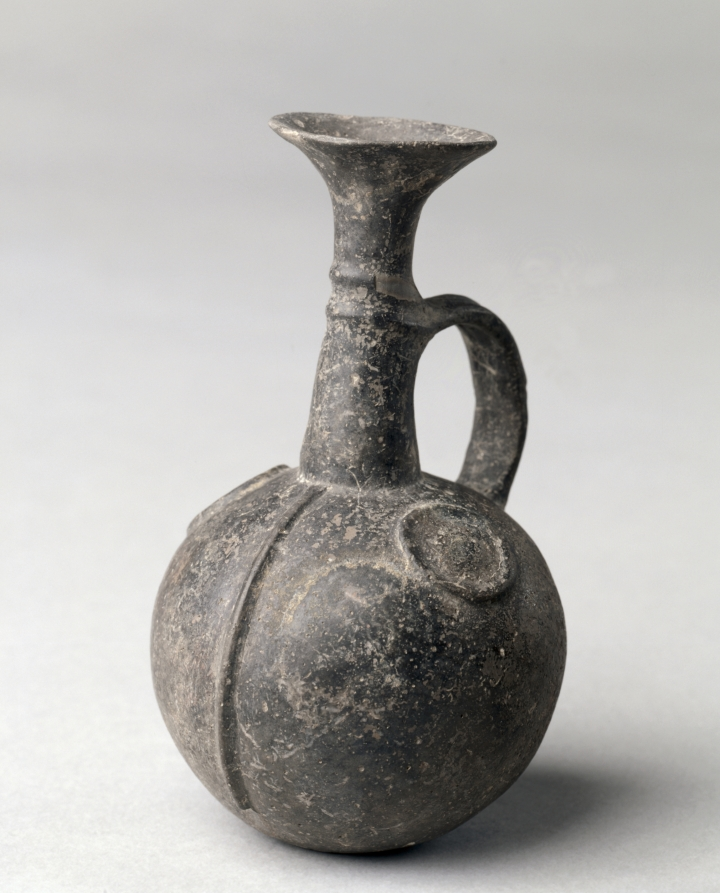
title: Jug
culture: Cyprus, late Cypriot I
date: c. 1600–1450 BCE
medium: base-ring ware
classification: Ceramic